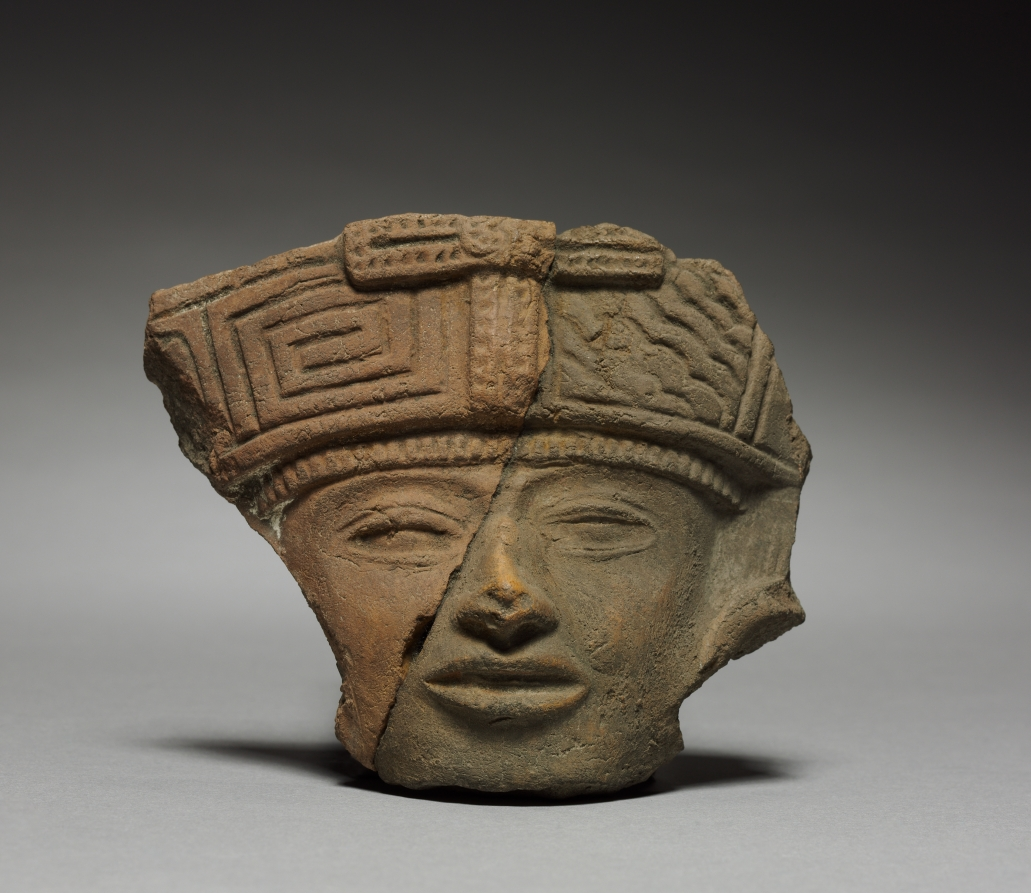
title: Head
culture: Mexico, Teotihuacan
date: 1–750 CE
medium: pottery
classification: Ceramic